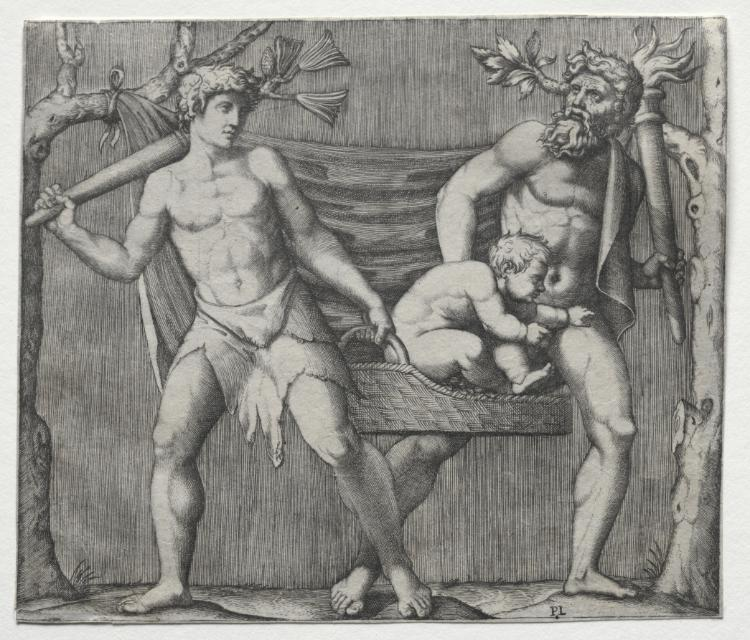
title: Two Fauns Carrying a Child in a Basket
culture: Italy, 16th century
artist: Marcantonio Raimondi (Italian, 1470/82–1527/34)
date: c. 1513–1515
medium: engraving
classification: Print